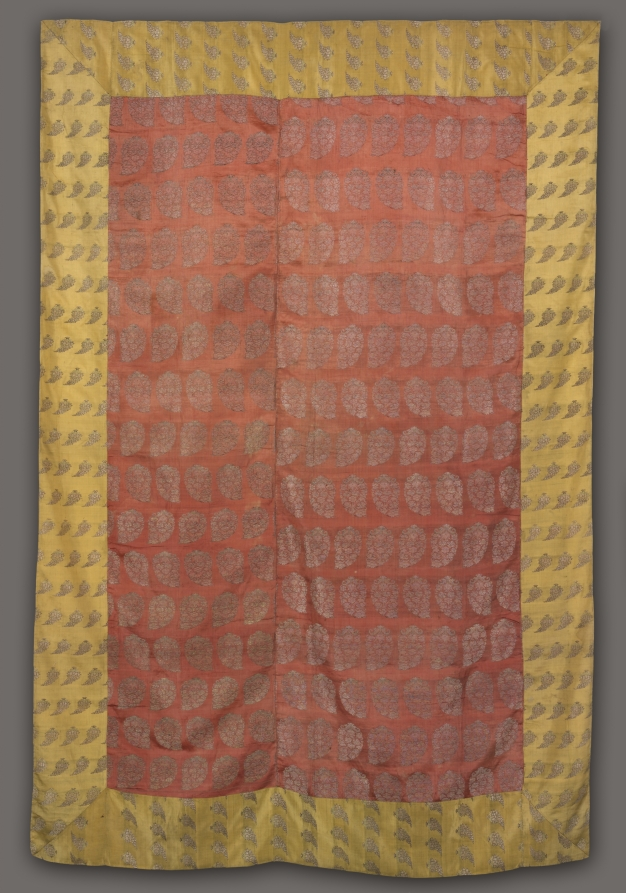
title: Summer Carpet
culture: India or Persia, 19th century ?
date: 19th century?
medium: brocaded satin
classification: Textile